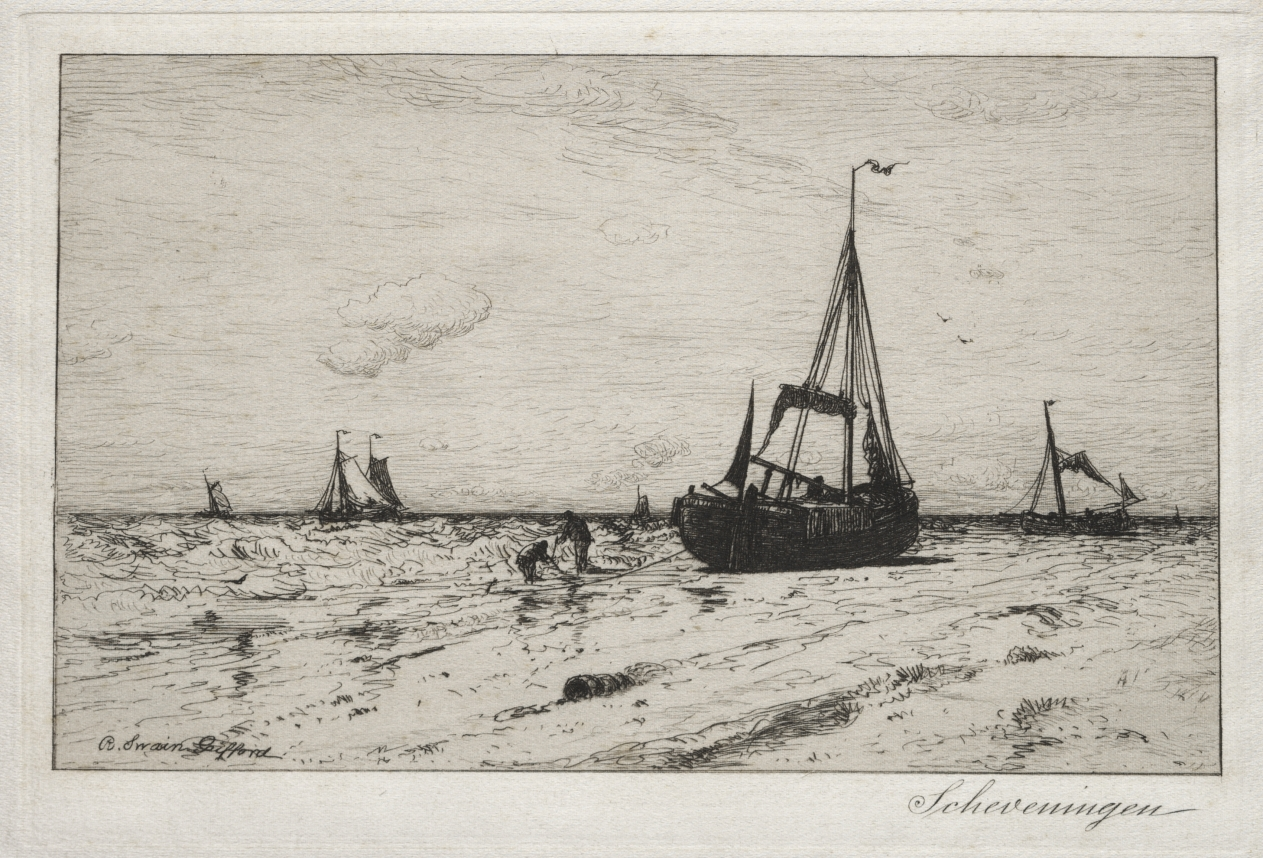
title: Scheveningen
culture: America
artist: Robert Swain Gifford (American, 1840–1905)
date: c. 1880s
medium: etching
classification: Print